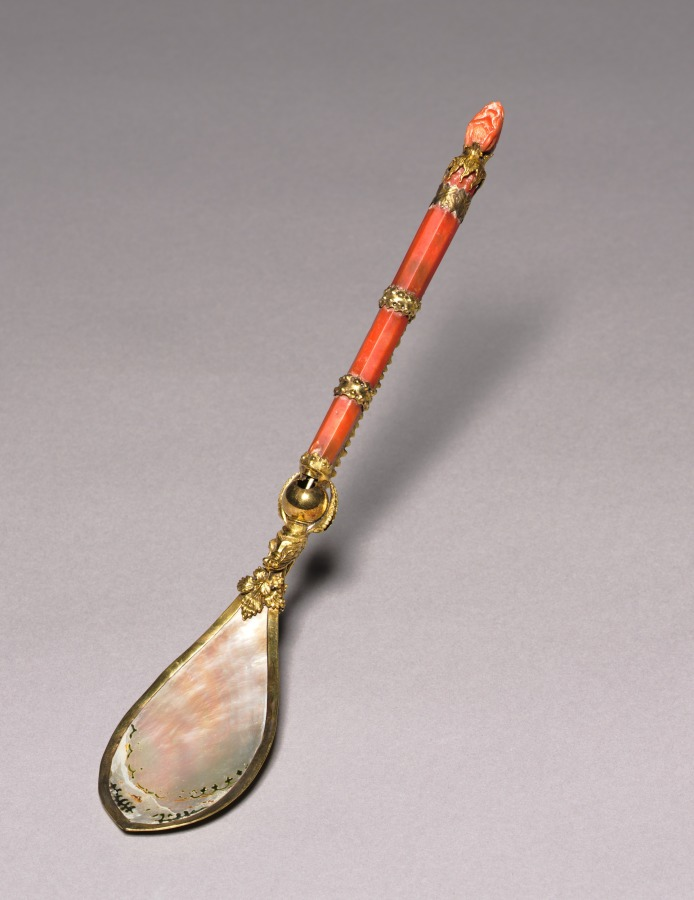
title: Spoon with Detachable Pick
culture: Italy, Venice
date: c. 1500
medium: enameled shell and coral, gilt-silver mounts; detachable pick with dragon's head finial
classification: Metalwork